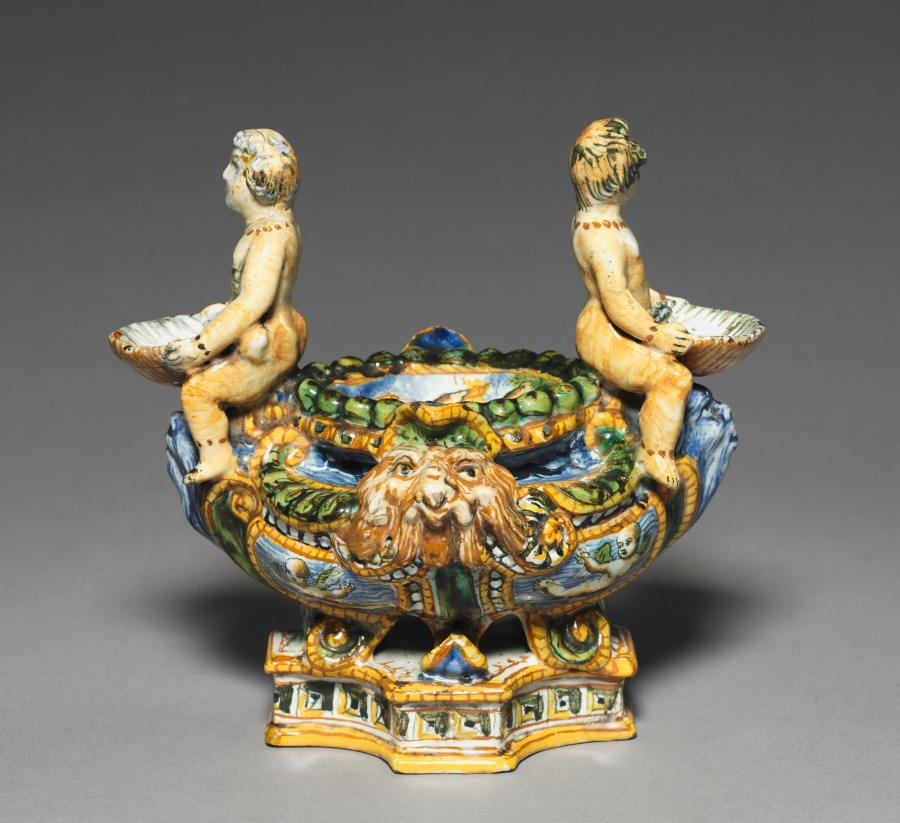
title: Pair of Saltcellars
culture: Italy, Urbino, 16th century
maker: circle of the Patanazzi Family (Italian)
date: c. 1570–90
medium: tin-glazed earthenware (maiolica)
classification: Ceramic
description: During the Italian Renaissance of the 1400s and 1500s, nobles and merchants eager to express their wealth and sophistication ordered ceramics for dining, display, and storage. Known as maiolica, because it resembled the brightly colored ceramics from the Mediterranean island of Majorca, these ceramic vessels were covered with a tin glaze that provided an opaque white surface on which colorful decoration could be painted.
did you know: During the Renaissance, salt was an expensive commodity and was used to both season and preserve food.